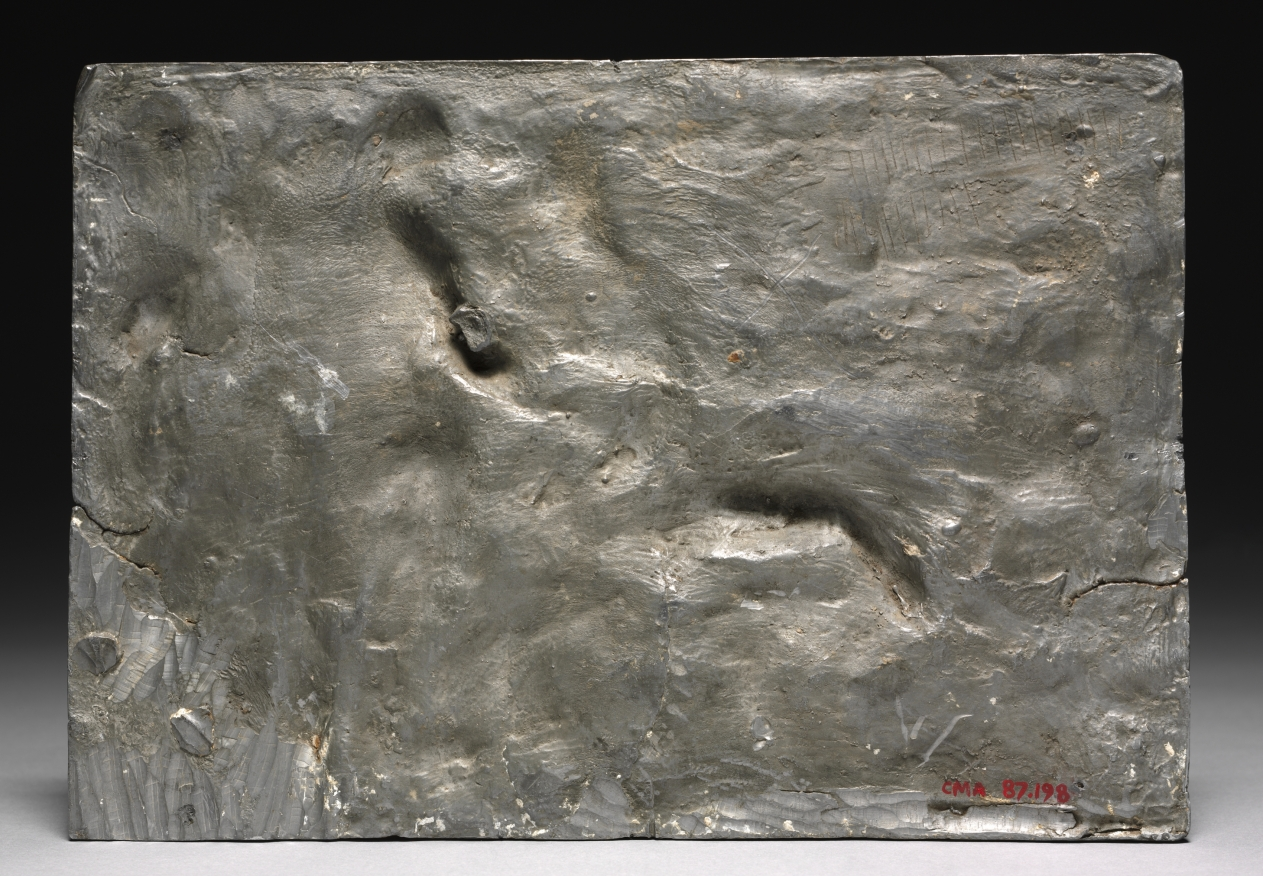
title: Venus and Adonis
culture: Austria, Vienna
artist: follower of Georg Raphael Donner (Austrian, 1693–1741)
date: mid-1700s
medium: lead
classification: Sculpture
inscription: inscribed in ink on top edge: 299.2.US [?] A [?].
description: Venus, the goddess of love, fell in love with the mortal Adonis. Here she urges him not to pursue the dangerous sport of hunting boar, advice he ignored, eventually leading to his death.